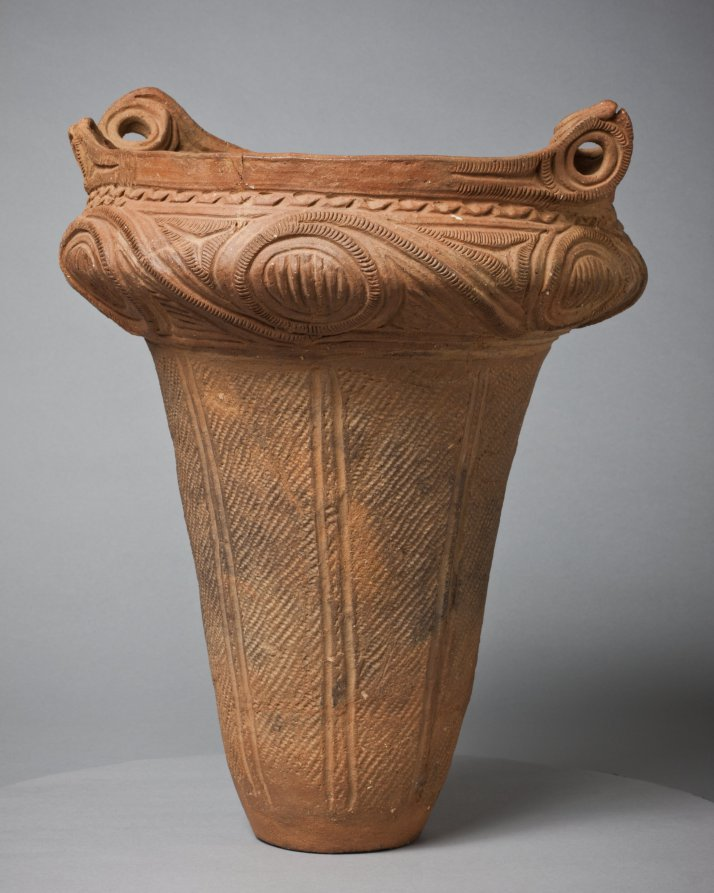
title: Urn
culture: Japan, Jōmon period (c. 10,500–300 BCE)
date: c. 2000 BCE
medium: earthenware, terracotta, impressed and incised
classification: Ceramic